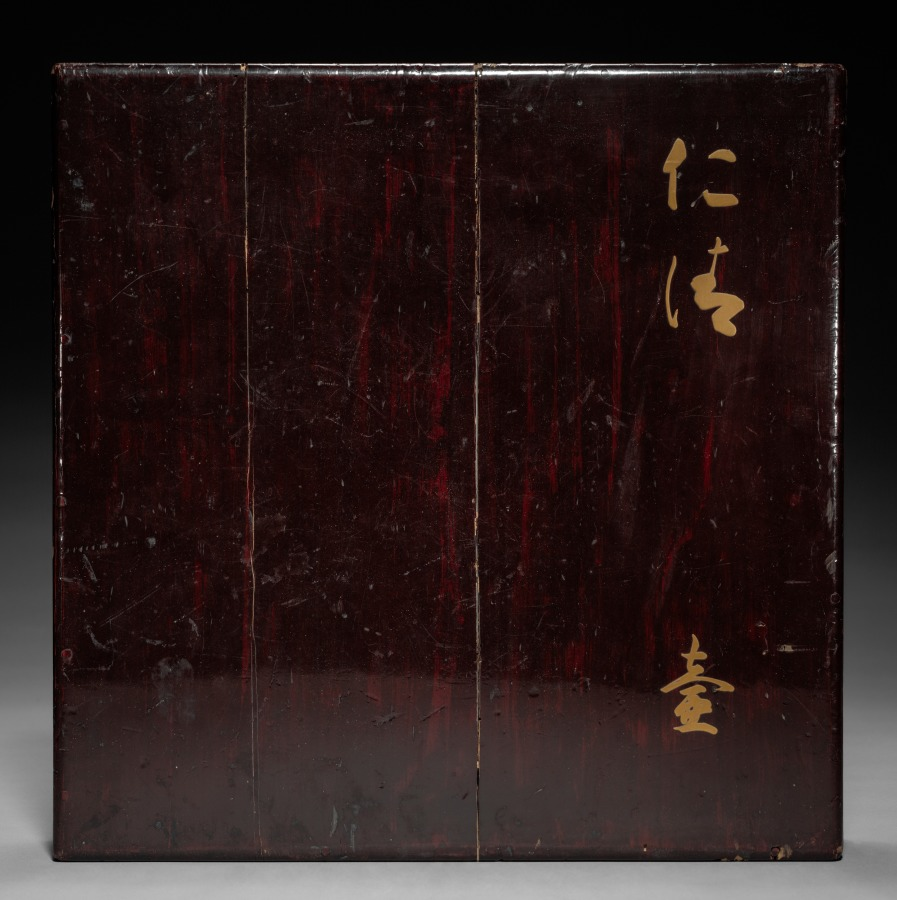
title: Tea Storage Jar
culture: Japan, Edo period (1615–1868)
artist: Nonomura Ninsei (Japanese, active 1640s–90s)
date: mid- to late 1600s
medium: Stoneware with white glaze (Shigaraki style)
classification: Ceramic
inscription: Ninsei seal impressed in the clay on bottom.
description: In this tea storage jar, Nonomura Ninsei reinterpreted a Shigaraki stoneware—made to hold agricultural products and known for its warm orange color, asymmetrical round forms, and irregular natural ash glazes—to produce a more refined piece that would appeal to tea masters seeking a touch of rusticity. In Japanese tea culture, hanging scroll paintings or calligraphy are placed in the tokonoma, or viewing alcove, for participants to admire and discuss along with the utensils used in the gathering. The scrolls are typically paired with vessels containing seasonal floral arrangements.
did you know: This jar may be considered an example of the aesthetic known as kireisabi, or refined rusticity.